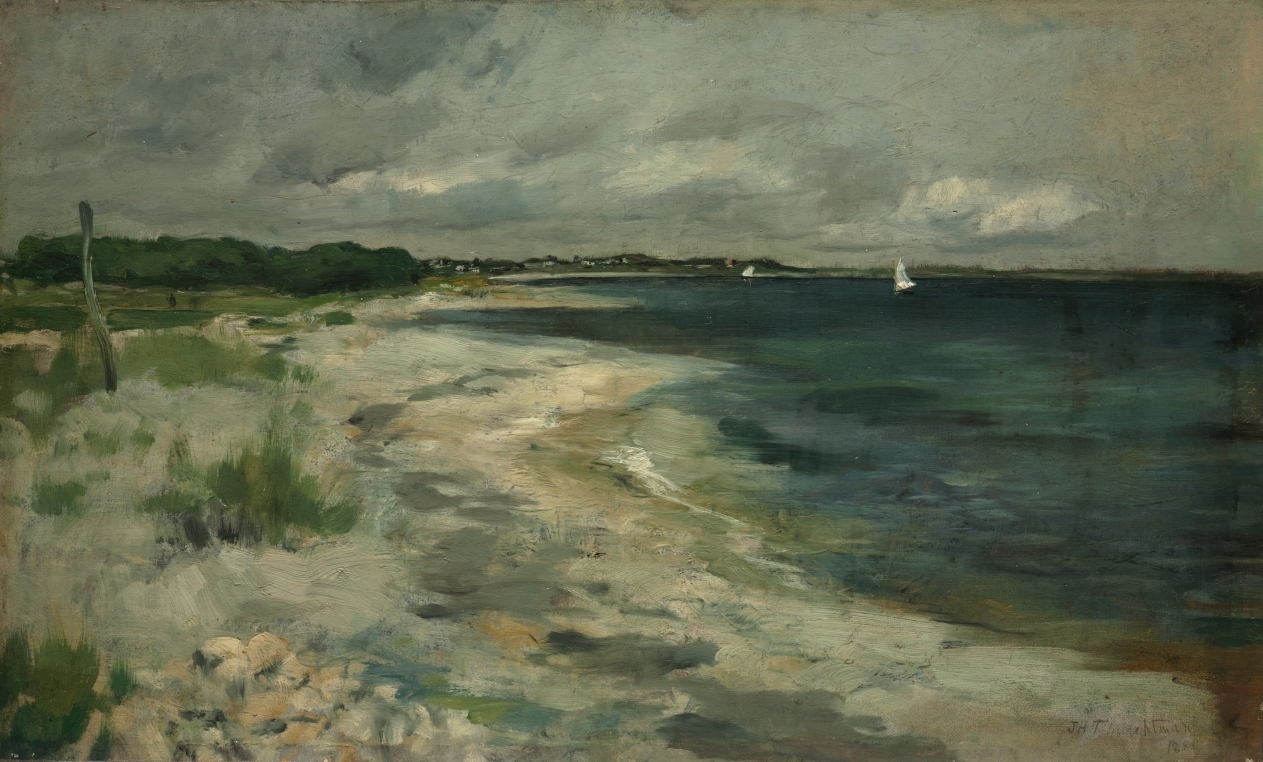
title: Storm Clouds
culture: America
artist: John Henry Twachtman (American, 1853–1902)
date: 1880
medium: oil on canvas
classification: Painting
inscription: Signed lower right: "J H Twachtman / 1880"